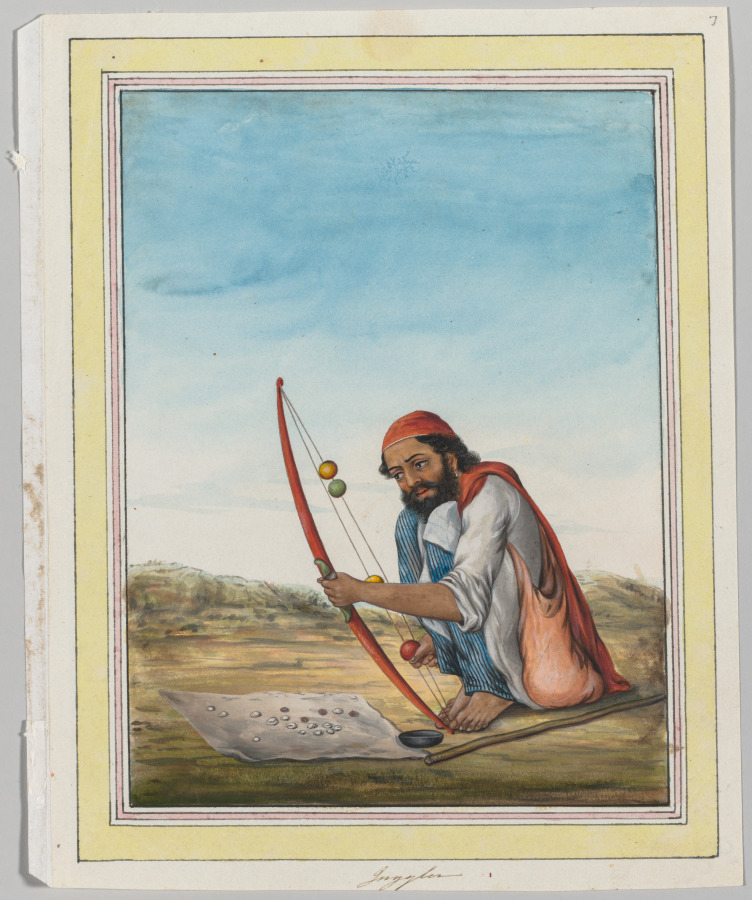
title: Juggler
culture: India, Company School, Lucknow or Patna, 19th century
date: c. 1840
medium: ink and gouache on paper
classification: Painting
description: A page from a book of paintings that would have included images of various entertainments in India, this painting is rendered in a European style for British consumption. The label Juggler is written in a Victorian-era hand in the margin below. The main figure is seated on the ground with his knees drawn tightly up under his chin, reinforcing a Western stereotype that all Indian people can do physical feats with their bodies, like yogis. On display are his talents of manipulating balls on a two-stringed bow, called “juggling” by the British owner of the painting for lack of a better moniker. His performance was intended to create a spectacle for entertainment and income. This painting would have been made for sale too, in the new economy under British dominance in which Indian artists made documentary pictures for foreign overlords.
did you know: Cowrie shells, in front of him, were used as money.